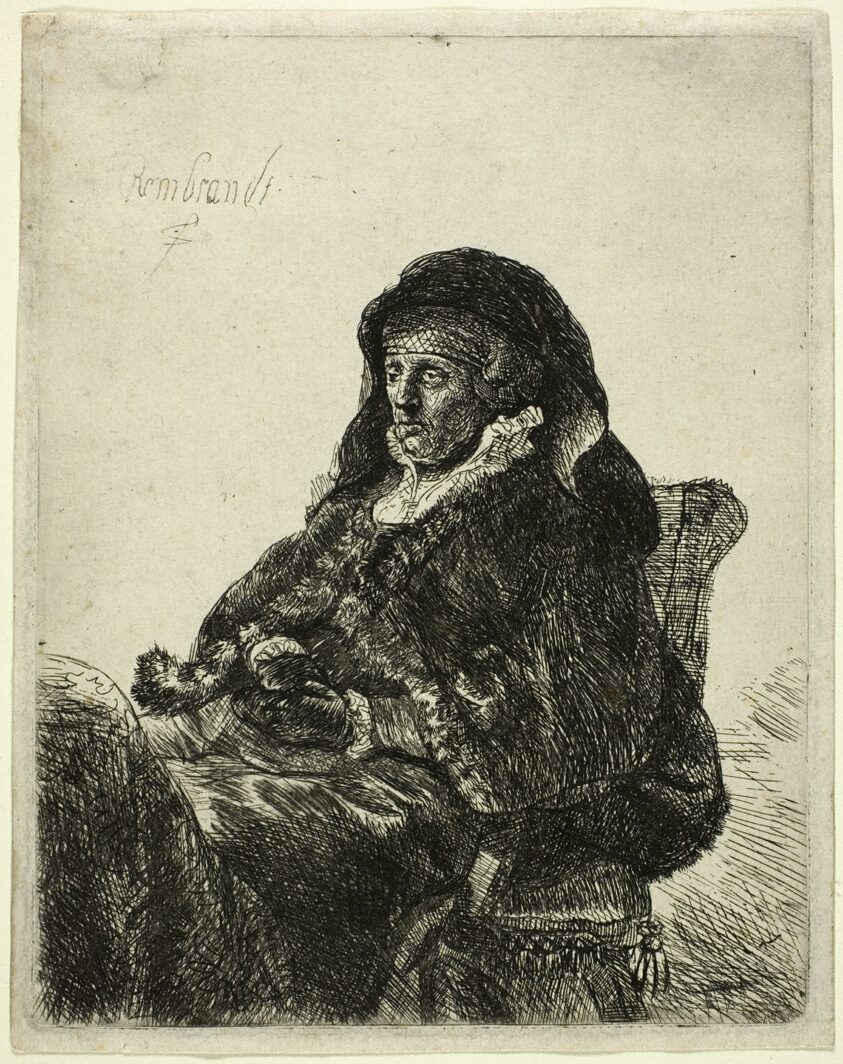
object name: Print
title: The Artist's Mother Seated at a Table, Looking Right: Three Quarter Length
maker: After Rembrandt van Rijn; Dutch, 1606-1669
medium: Etching on white wove paper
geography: Netherlands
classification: etching; print; prints and drawing; paper